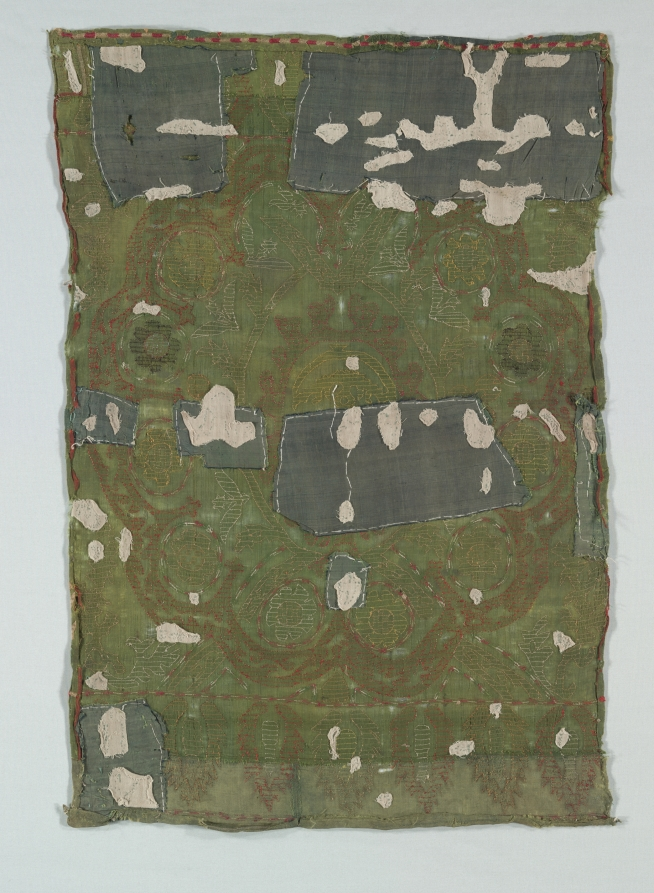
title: Cushion Cover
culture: Dagestan, 18th century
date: 1700s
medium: embroidery, silk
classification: Embroidery